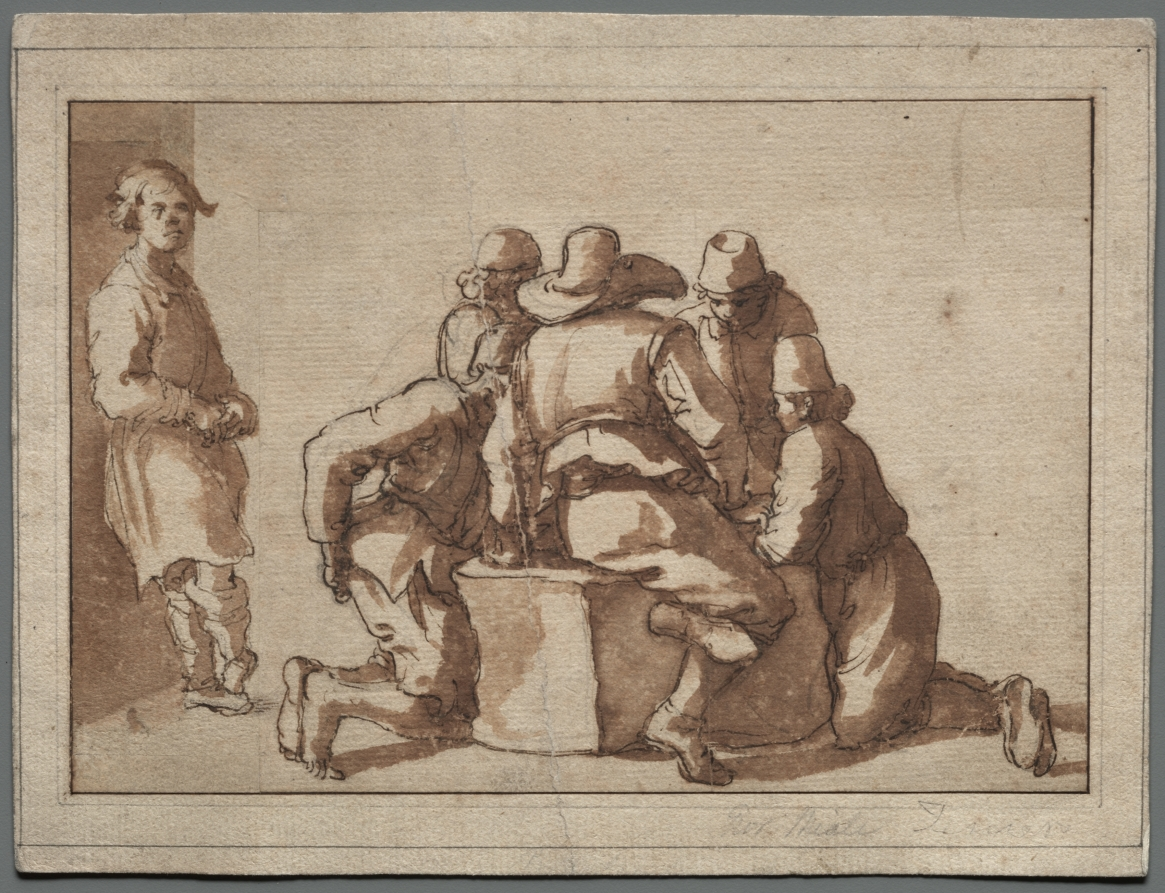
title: Genre Scene of Young Men Playing a Game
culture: Italy, 16th century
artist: attributed to Frederico Zuccaro (Italian, 1540/1–1609)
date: c. 1550s-1609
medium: pen and brown ink and brush and brown wash over graphite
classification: Drawing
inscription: secondary suuport, lower right, in graphite: [illegible] Miali[?] Zuccaro[?]